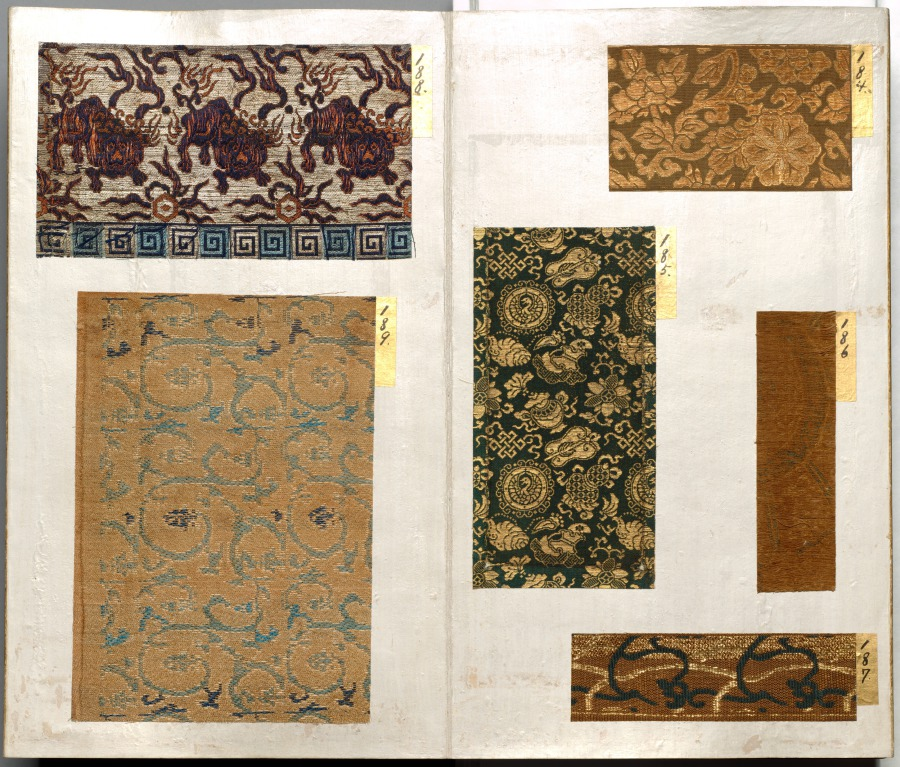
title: Album of Textile Samples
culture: Japan, Edo period (1615–1868)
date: 1600s-1700s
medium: silk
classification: Textile